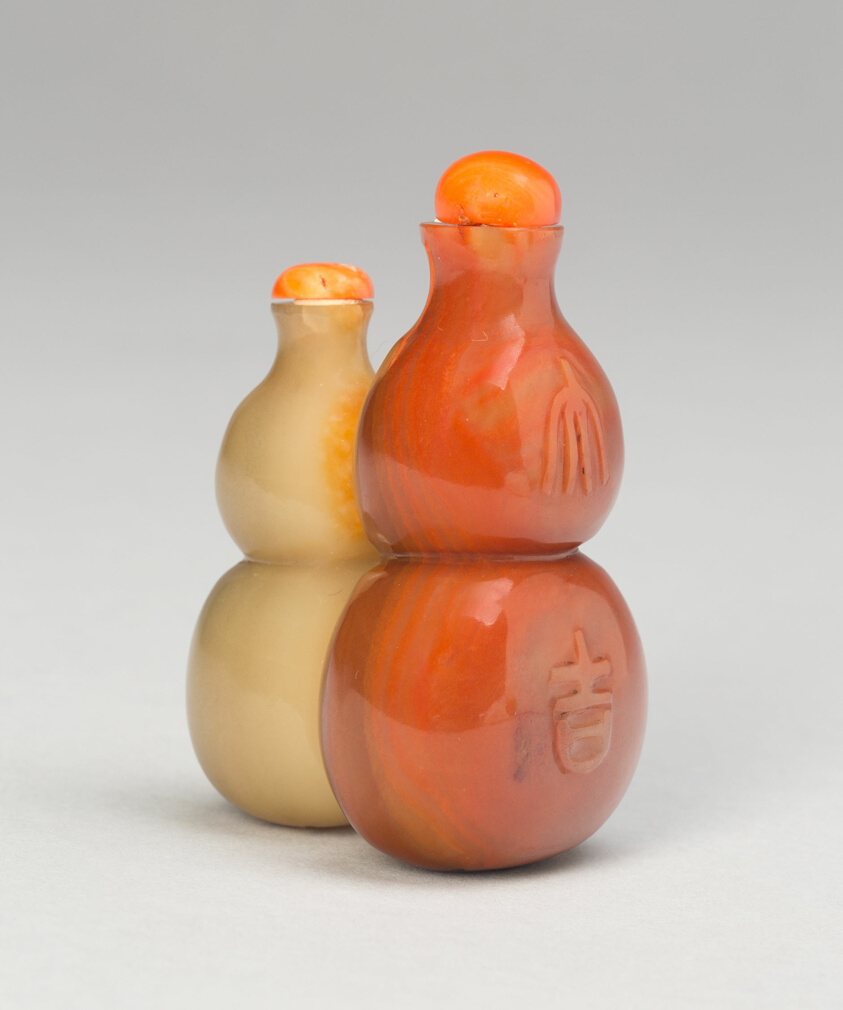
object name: Vessel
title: Gourd-Shaped Double Snuff Bottle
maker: China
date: Qing dynasty (1644–1911), 1780–1880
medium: Chalcedony with carved decoration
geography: China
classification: snuff bottle; asian art; vessel